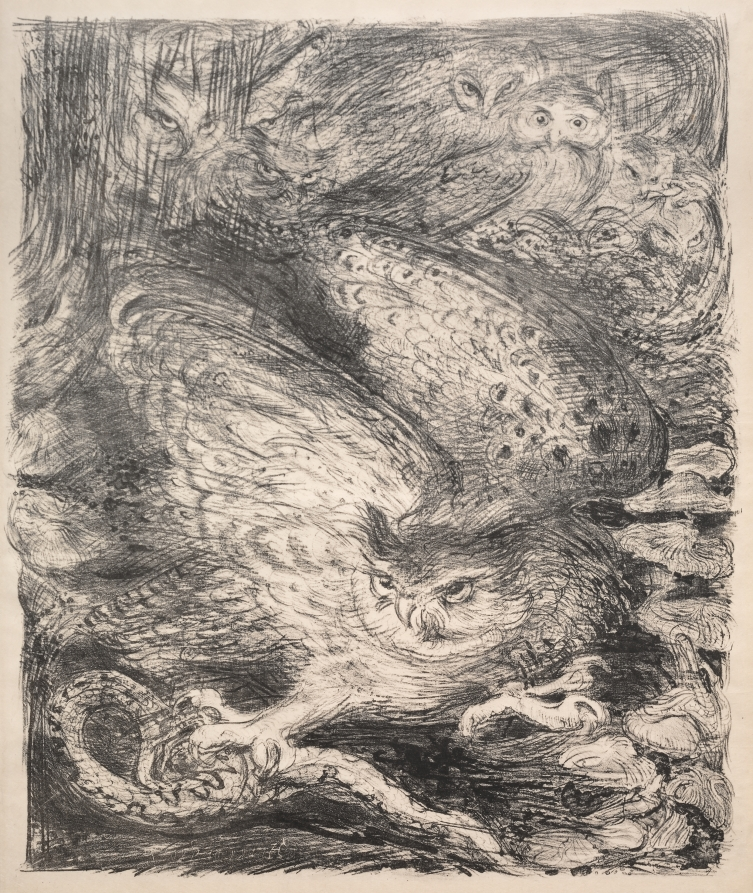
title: The Vintages!: Seven Owls and a Serpent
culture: Belgium, late 18th-early 19th century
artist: Henri de Groux (Belgian, 1867–1930)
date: c. 1900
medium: lithograph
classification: Print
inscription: lower left in stone: Henri de Groux (in reverse)